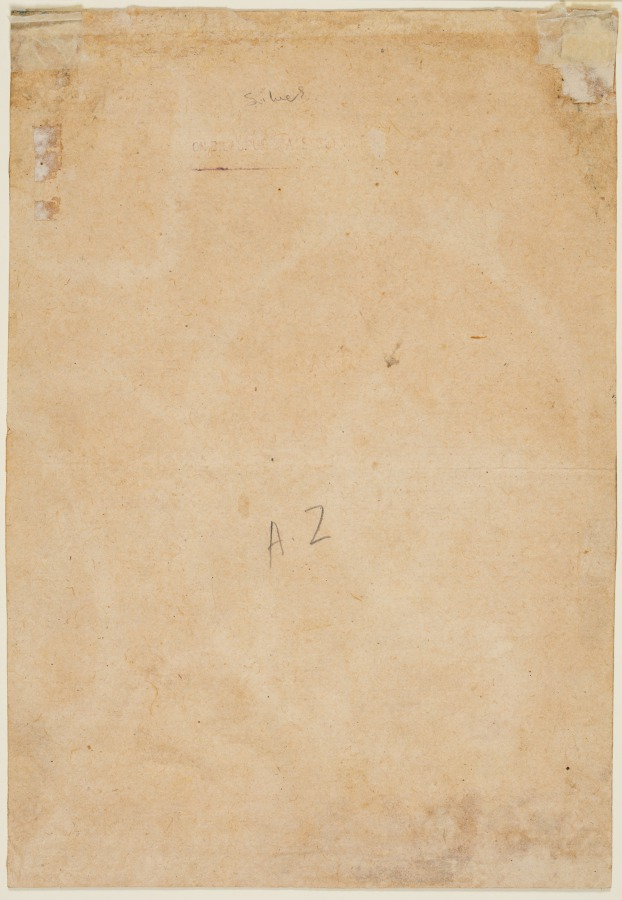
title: Palace women enjoy music by the side of a cascade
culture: Northern India, Pahari kingdoms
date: c. 1780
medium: gum tempera, gold and silver on paper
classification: Painting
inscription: Purple stamp reading "ON BILASPUR DAIS SERVICE". Written in pencil in a European hand: "A.Z" and "silver"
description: Sitting by an artificial cascade in a palace, a woman smokes a hookah and enjoys a music performance with her attendants. She raises her left hand in appreciation of the musicians and turns toward a companion (sakhi) who also shares her enthusiasm. Three attendants stand behind her—one holding a box of betel leaves, while the other two hold a fly whisk and a fan.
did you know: One woman is gently washing the right foot of the lady. This composition is based on a Mughal painting.